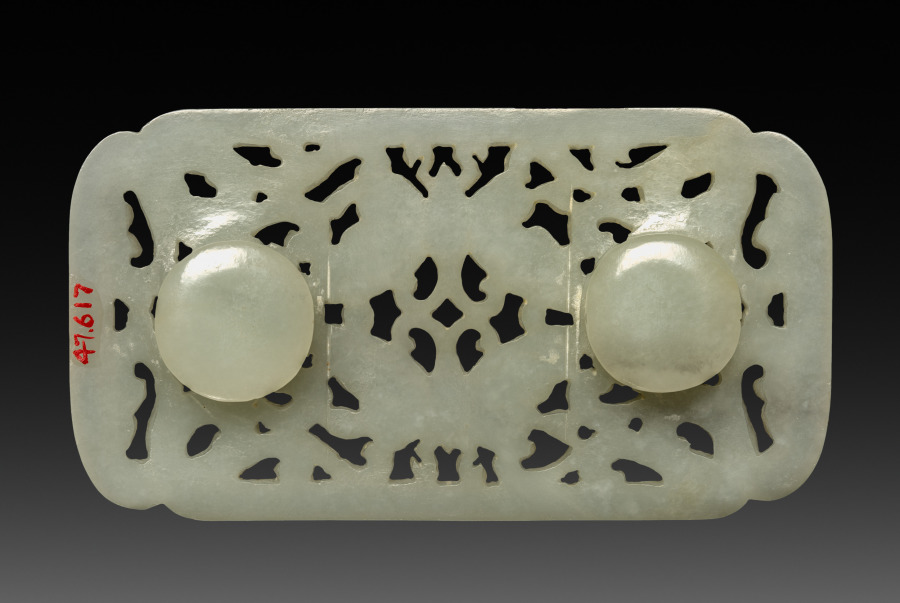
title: Buckle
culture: China, Qing dynasty (1644-1911) or Republican period (1912-49)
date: 1900s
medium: white jade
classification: Jewelry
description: The jade buckle is perforated to represent two butterflies, scroll patterns, and coins.